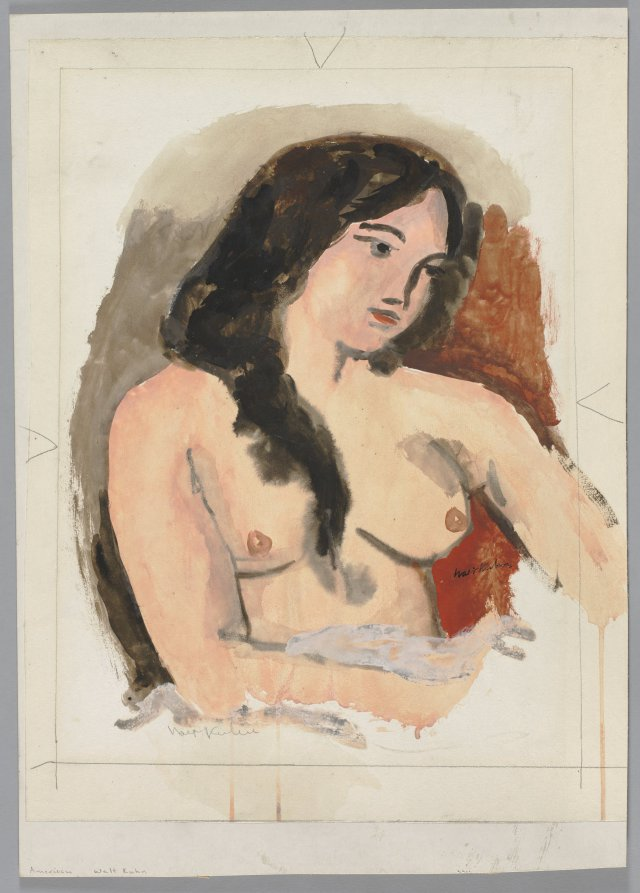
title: Bust of Sophie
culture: America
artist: Walt Kuhn (American, 1880–1949)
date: c. 1900–1929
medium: watercolor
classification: Drawing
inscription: Signed, left of bottom center: "Walt Kuhn"